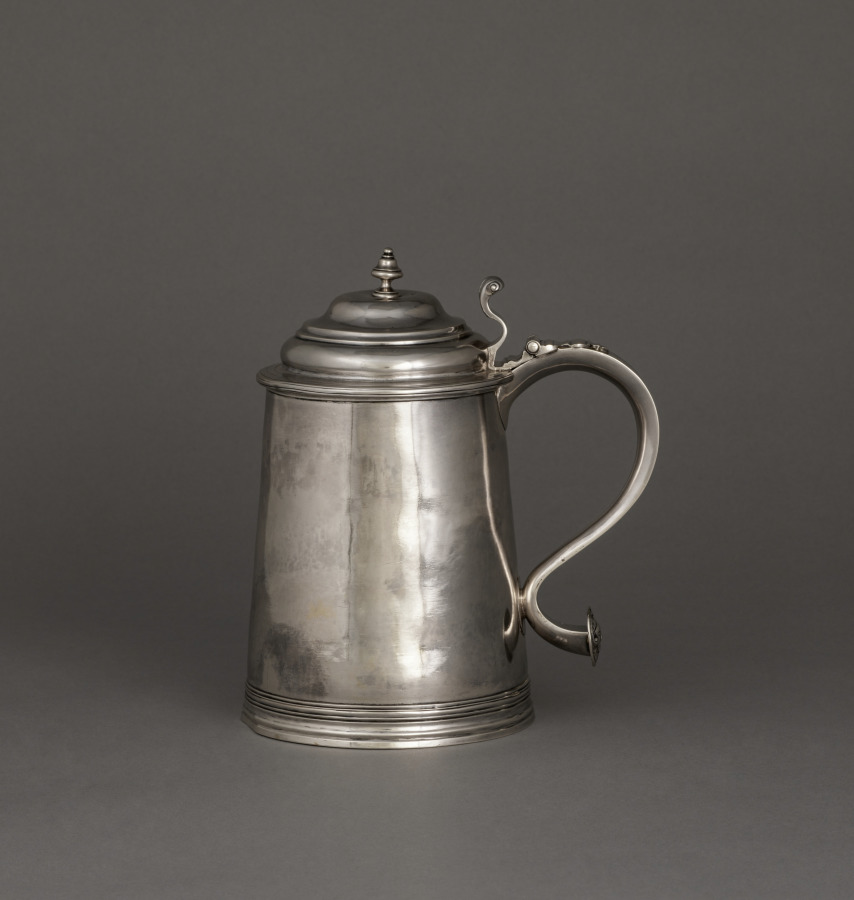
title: Tankard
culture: America, Rhode Island, Exeter and South Kingston, 18th century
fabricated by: Samuel Casey (American, c. 1724–c. 1780)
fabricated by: Thomas Arnold (American, 1734–1828)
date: c. 1750–1770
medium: silver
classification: Silver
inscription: engraved "G" over "W * I" in block letters on top of handle.